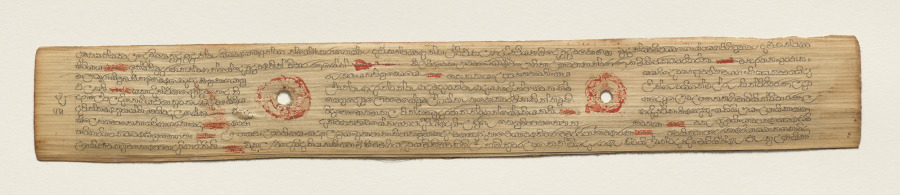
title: Leaf from a Buddhist Manuscript (recto)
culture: Sri Lanka, Singhalese, Late 17th century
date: c. 1700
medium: fiber paper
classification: Manuscript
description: Palm leaf material is still used for manuscripts in Sri Lanka. The palm leaves are prepared first by boiling them, drying them in the sun, and then rubbing them with oils. Scribes then use a metal stylus to incise the text. Then charcoal powder is wiped across the pages, filling in only the inscribed lines.